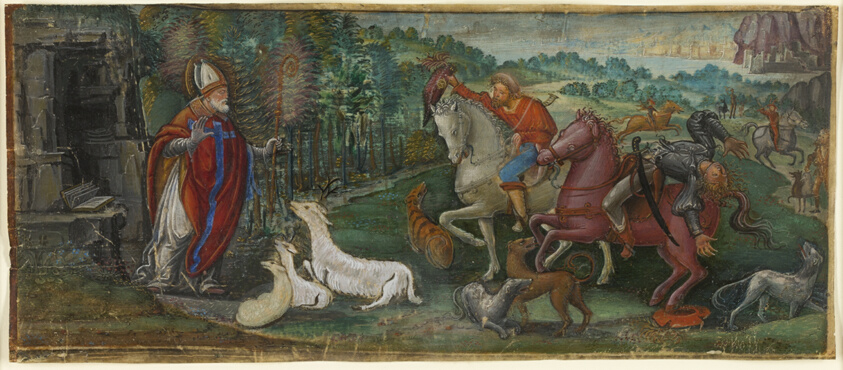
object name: Drawing and Watercolor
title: Miracle of the Deer of Saint Bassiano, from a Choir Book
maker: Master B. F. (possibly Francesco Binasco); Italian (Lombardy), about 1490-about 1545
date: 1500/10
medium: Opaque watercolor and shell gold on parchment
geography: Italy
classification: watercolor; prints and drawing